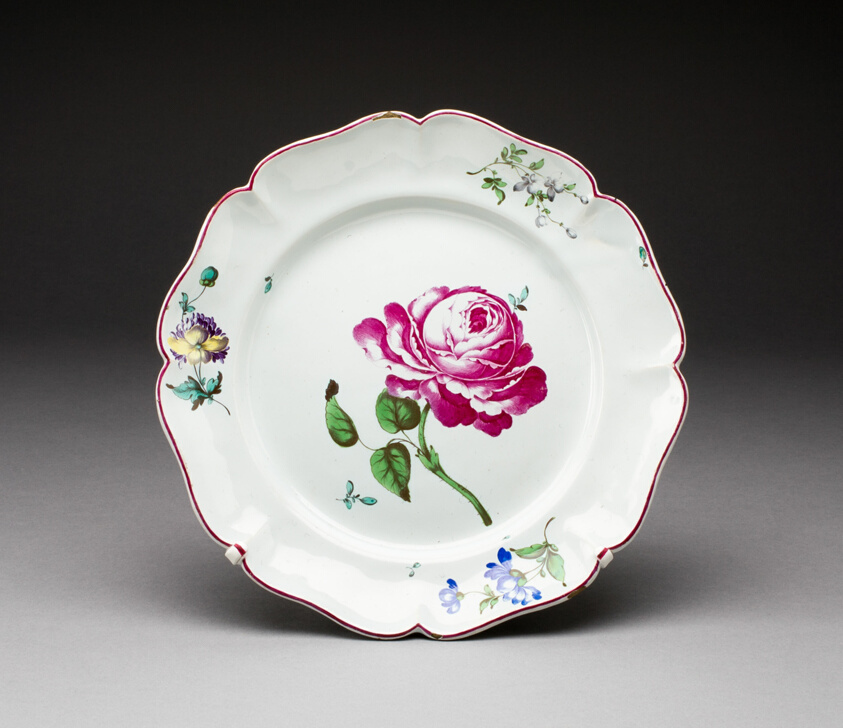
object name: Ceramics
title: Plate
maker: Niderviller Pottery Factory; French, founded 1754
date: c. 1770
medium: Tin-glazed earthenware (faience)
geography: Niderviller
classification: plate (general, dish); dish (vessel); tin-glazed ware; earthenware; european decorative arts; ceramics